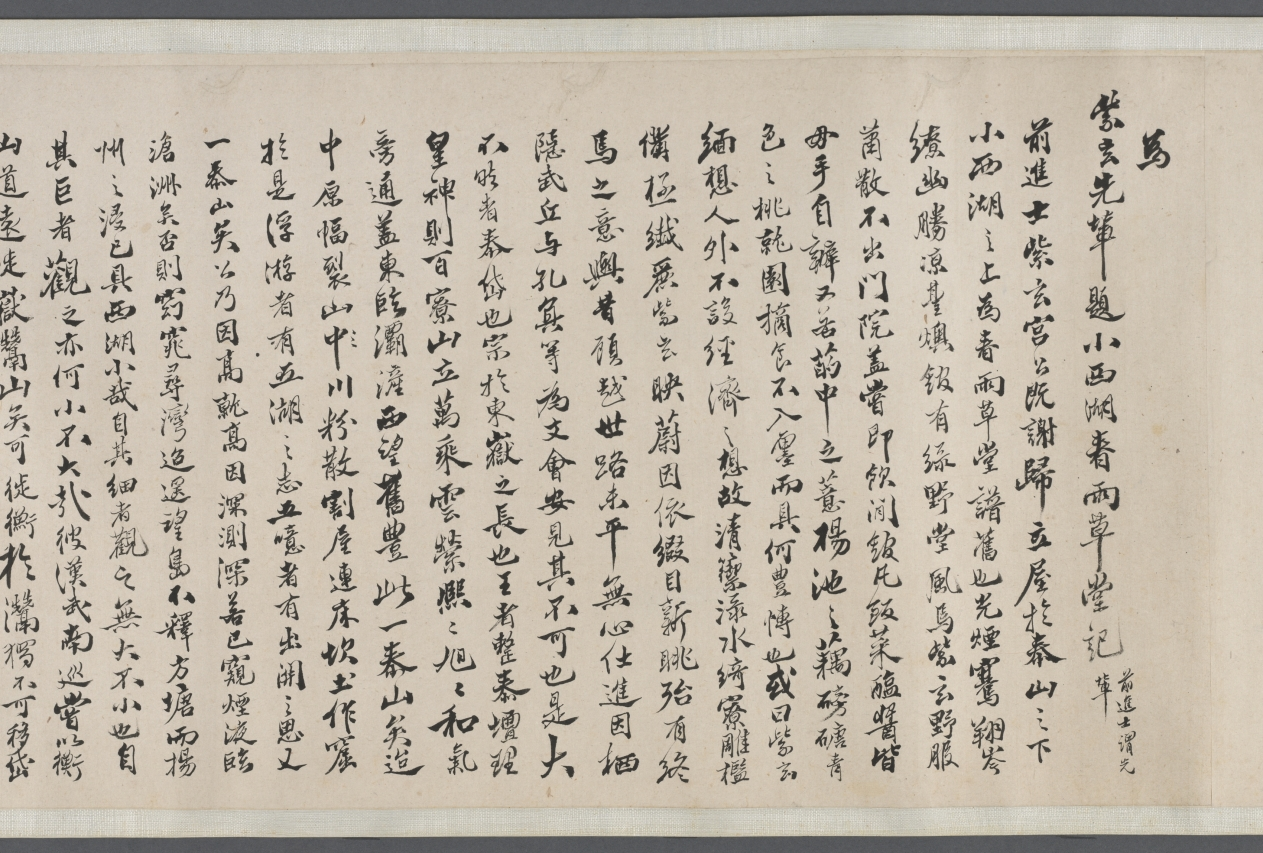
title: Spring Rain Thatched Hut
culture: China, Qing dynasty (1644-1911)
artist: Wang Jianzhang (Chinese, active 1621–1662)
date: 1650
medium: handscroll, ink on paper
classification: Drawing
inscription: Title by Wu Zhiying 吳芝瑛 (1868–1933), dated 1910.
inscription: 春雨草堂圖。庚寅仲春，為紫玄社兄畫於若耶溪上。 仲初王建章。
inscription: 12 colophons by Gong Weiliu’s 宮偉鏐 (1611–1680) contemporaries: Fang Gongqian 方拱乾 (1596–1667, jinshi of 1628); Jiang Cai 姜埰 (1607–1673); Liang Yizhang 梁以樟 (1608–1665); Du Shaokai 杜紹凱 (also named Du Jie 杜岕, 1617–after 1689), dated 1648; Zhao Kaixin 趙開心 (d. 1663), dated 1647; Zhao Erbian 趙而忭 (d. 1658); Yu Yaoguang 余耀光, dated 1649; Yao Quan 姚佺, dated 1648; Chen Taisun 陳台孫 (b. 1611, jinshi of 1640); (Monk) Shao 韶; Du Zhujin 杜祝進; and Tang Shi 唐時.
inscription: 此研田莊居士王建章為先太史紫元公所作春雨草堂圖也。居士字仲初，明崇禎間人，與先太史及惲香山相友善。喜畫佛像，自謂不讓李公麟。山水祖述董源，筆力雄健，有不可羈勒之概。香山稱其墨有五采，非世人所知。然性廉重，非同志不輕落筆，人得其寸圖尺縑，必相與忻賞，如獲蜼彝兕敦，非人世間物也！見先太史筆記，此圖寫雨景，而氣韻生動，勃勃於不能止。每一展覽，覺滿紙雲烟，墨瀋猶濕，如寫吾先人胸中未盡之邱壑也。圖後題詠，多一時名手，想見文采風流之盛。迄今二百餘年，舊德先疇，遺風未沫。吾子孫其永寶之，如與吾先人接謦咳於一堂，為感思之助，其敢作圖畫觀乎！同時香山亦有圖佚去己久，不知異日能為延津之合否。壬申長夏本昂重裝敬識。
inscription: Collectors' seals including: Gong Ben'ang 宮本昂 (1821–1874); Lian Qian 廉泉 (1868–1932); Wu Zhiying 吳芝瑛 (1868–1933)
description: With its striking simplicity, this painting captures the pure serenity of a private garden in the moist atmosphere of a spring morning on a small river. Painted in the style of Ni Zan, Wang Jianzhang dedicated this work to his patron-friend Gong Weiliu (1611-1680). Gong retired from government service after the fall of the Ming dynasty and constructed a garden-retreat at his native home in Taizhou, Jiangsu province. He invited scholars and poets from his literary society to contribute writings of his estate, which are here mounted together with the painting in this scroll.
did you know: Gong Weiliu, the owner of the estate portrayed here, had received his prestigious jinshi degree in 1643, but his official career was thwarted by the collapse of the Ming dynasty the following year.